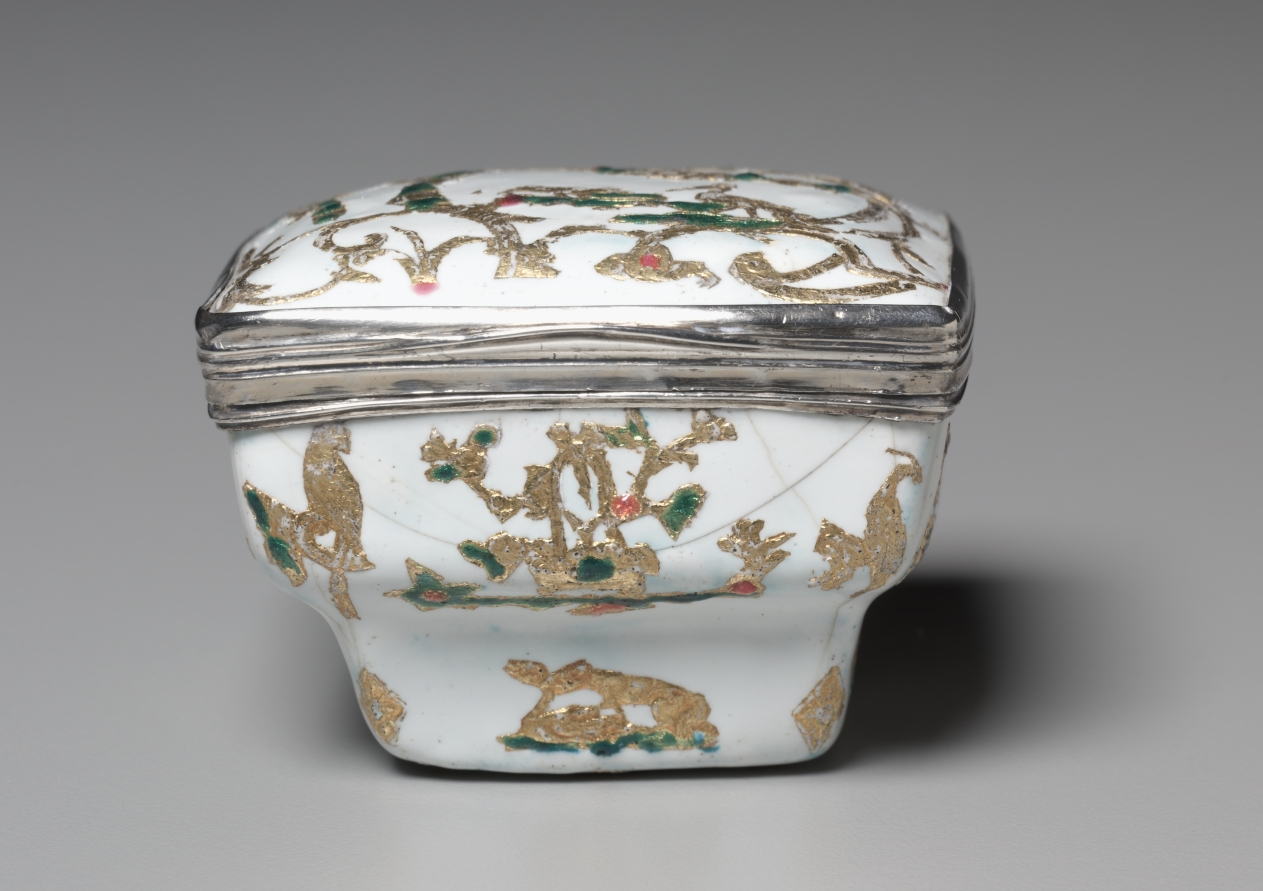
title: Box (Boîte)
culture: possibly France, mid-18th century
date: 1730–40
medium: enamel and gold leaf on copper mounted in silver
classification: Miscellaneous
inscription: [Traces of marks on mounts, too rubbed to be legible. One has previously been identified as possibly a French discharge mark of middle-18th century (Beuque 669 or 687). Maybe the discharge mark for small work of Hubert Louvet, Paris, 1732-38, left side of rim.]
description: Chinoiserie in 18th-century France incorporated imitations of East Asian motifs, designs, and ornaments into European art. These imitations were often distorted by the European imagination and were not accurate representations of the cultures from which they drew inspiration. Motifs typical of chinoiserie can be seen in this box’s floral patterns and repeated representations of pagodas, dragons, and peacocks.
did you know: The depictions of various animals and plants on this box have been covered in a very thin layer of gold called gold leaf.